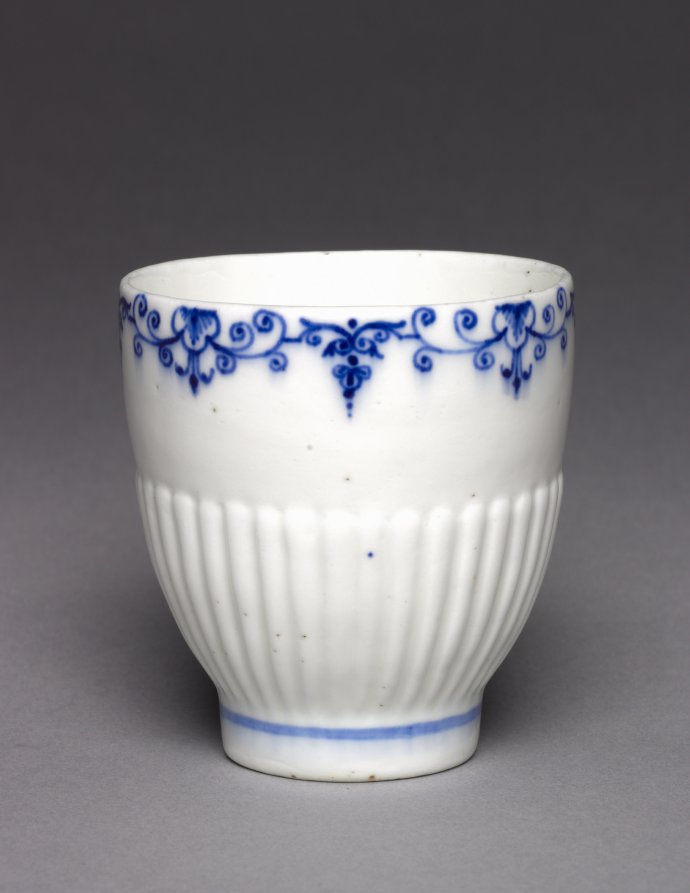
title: Cup (Tasse)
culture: France, Mennecy, 18th century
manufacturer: probably by Villeroy Factory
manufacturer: Mennecy- Villeroy Factory (French)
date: c. 1737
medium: soft-paste porcelain with underglaze blue decoration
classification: Ceramic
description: As European porcelain production advanced, factories borrowed designs and techniques from one another in order to remain competitive in the porcelain market. This early cup is decorated with a border pattern with a draped effect, often referred to as lambrequin, typical of the Saint-Cloud porcelain factory. The blue and white underglaze attempts to emulate the colors characteristic in imported Chinese porcelain.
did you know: The Villeroy porcelain factory, established by François Barbin, was only in production for 11 years before it relocated to Mennecy in 1750.